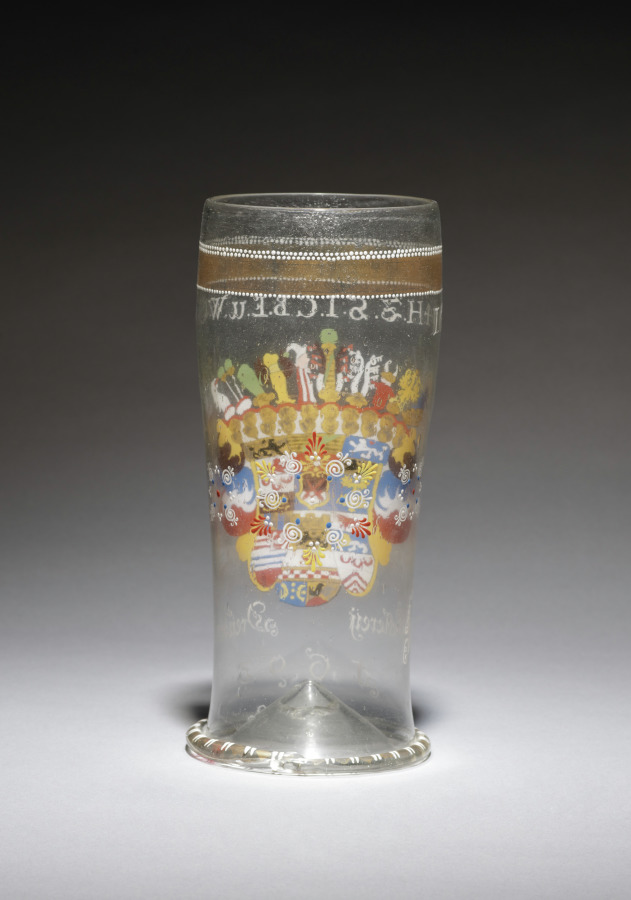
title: Beaker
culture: Germany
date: 1693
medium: enameled glass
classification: Glass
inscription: I[ohann] G[eorg] D[er] 4 H[erzog] z[u] s[achsen] I[ulich] c[leve] B[erg] E[ngern] U[nd] W[estphalia] c[hurfürst]. Below the arms of the duke, in white enamel is the inscription: HOFFKELLEREY, DRESZDEN.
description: This humpen was made for the court cellar (Hofkellerei), Dresden, which belonged to the House of Saxony, showing the arms of Johann IV zu Sachsen.